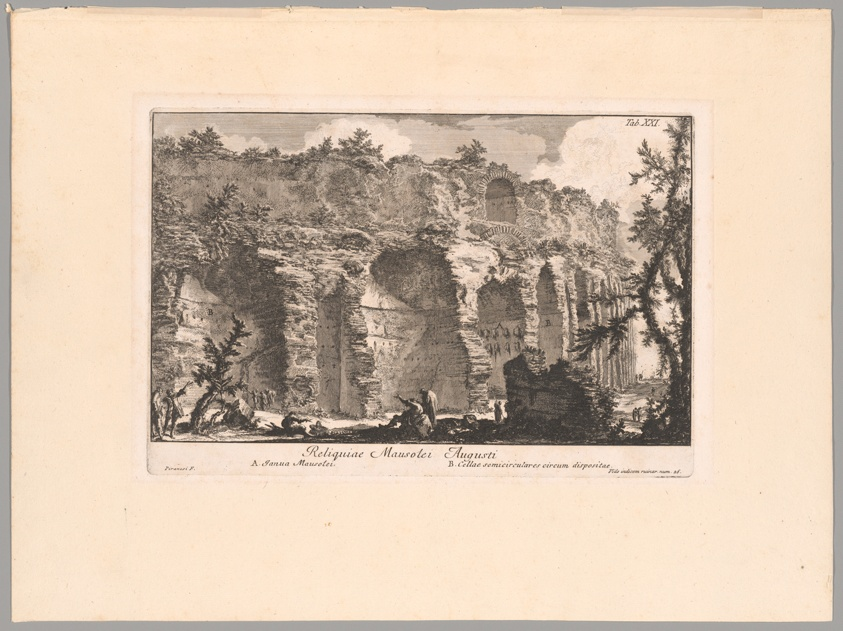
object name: Print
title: The Remains of the Mausoleum of Augustus, plate XXI from The Campus Martius of Ancient Rome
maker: Giovanni Battista Piranesi (Italian, 1720–1778)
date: first published 1762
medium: Etching in black ink on cream laid paper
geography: Italy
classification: print; paper; prints and drawing; etching